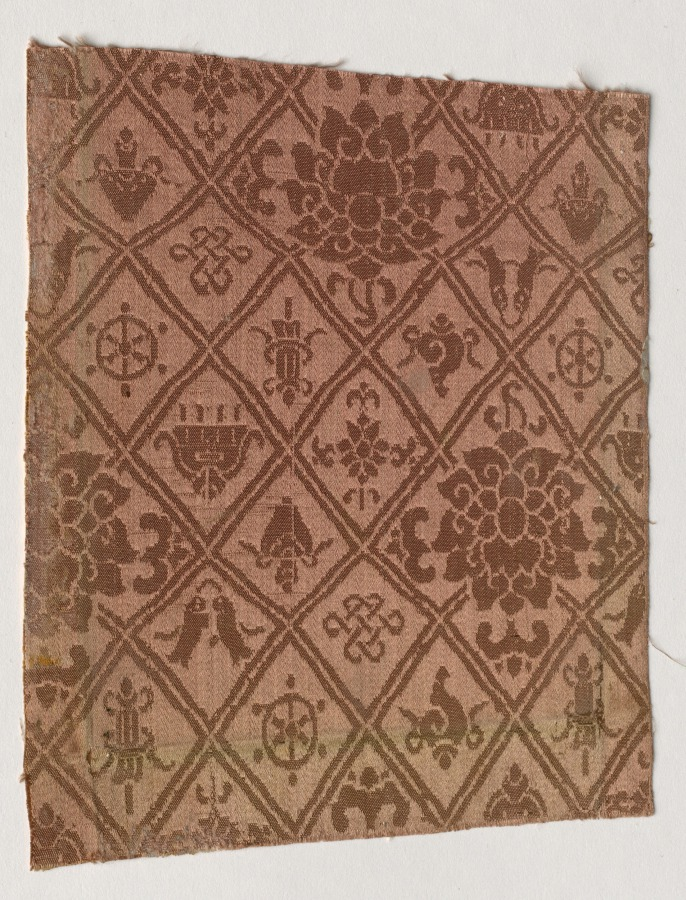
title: Fragment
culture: China ?, 19th century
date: 1800s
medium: silk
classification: Textile